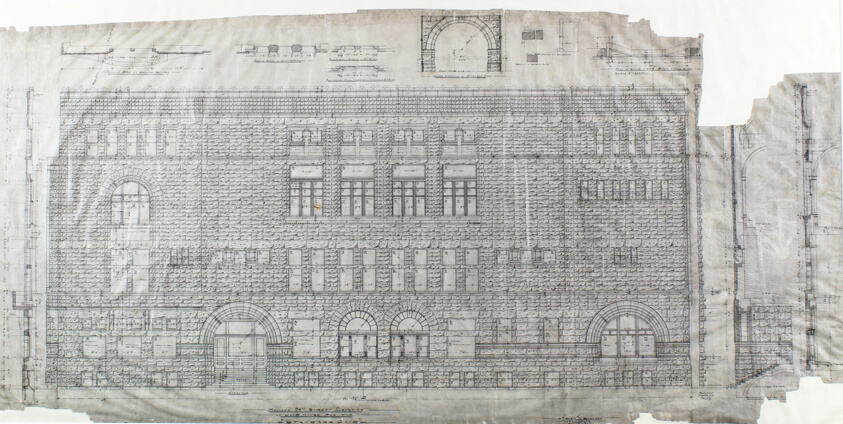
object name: Architectural Drawing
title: Revised 24th Street Elevation for Standard Club, Chicago, Illinois, Details and Sections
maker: Adler & Sullivan, Architects (American, 1883-1895)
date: 09/19/1887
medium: Graphite and ink on linen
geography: Michigan Avenue at 24th Street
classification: architectural working drawing; architectural drawing; architecture